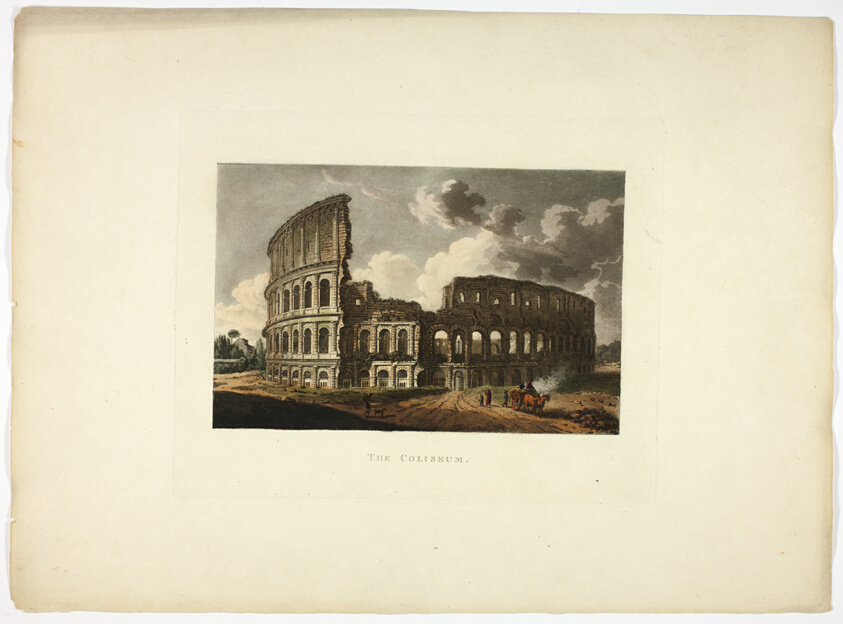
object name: Print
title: The Coliseum, plate fifteen from the Ruins of Rome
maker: M. Dubourg, (English, active 1786-1838); published by J. Merigot (Italian, Unknown)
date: published 1796/98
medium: Hand-colored aquatint on paper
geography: England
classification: aquatint; print; prints and drawing